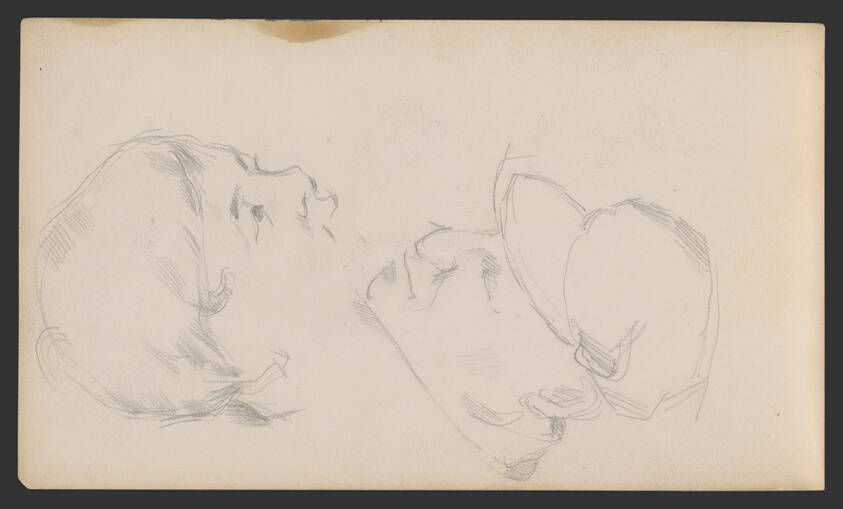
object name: Drawing and Watercolor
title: Sketchbook No. 2 (L'Estaque)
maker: Paul Cézanne; French, 1839-1906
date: 1875–86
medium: Graphite and pen and ink drawings on paper, bound into a book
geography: France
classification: sketchbook; graphite; prints and drawing; paper